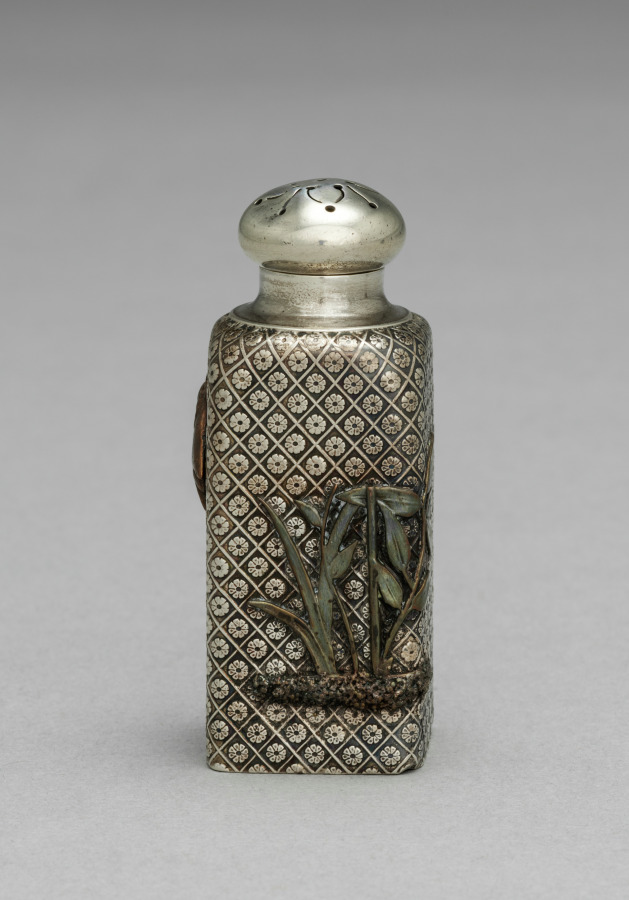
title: Salt Shaker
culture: America, Rhode Island, Providence, 19th century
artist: Gorham Manufacturing Company (America, est. 1831)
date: c.1875–1885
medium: silver and mixed metals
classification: Silver